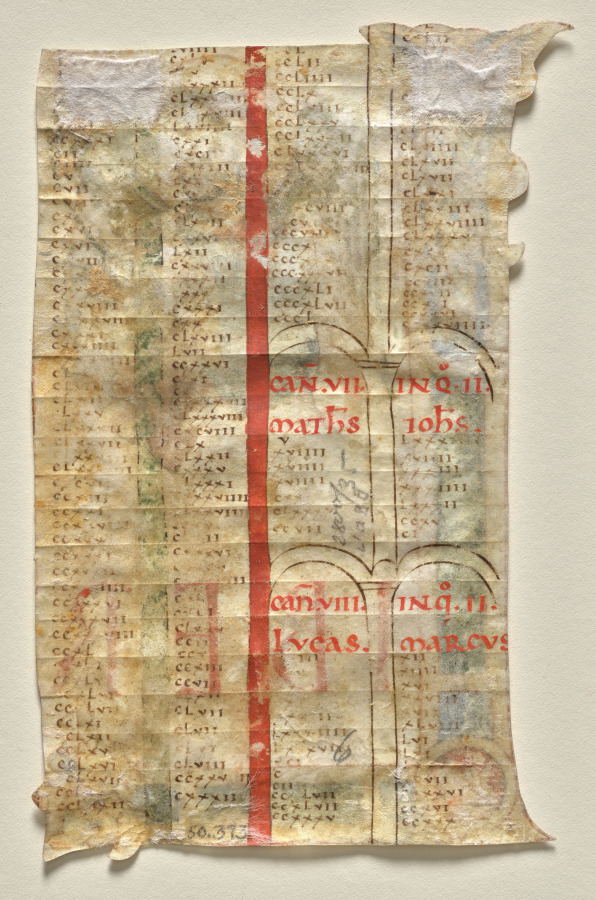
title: Canon Tables (verso)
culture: Italy, Florence, 12th century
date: c. 1125–1150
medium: ink and tempera on vellum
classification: Manuscript